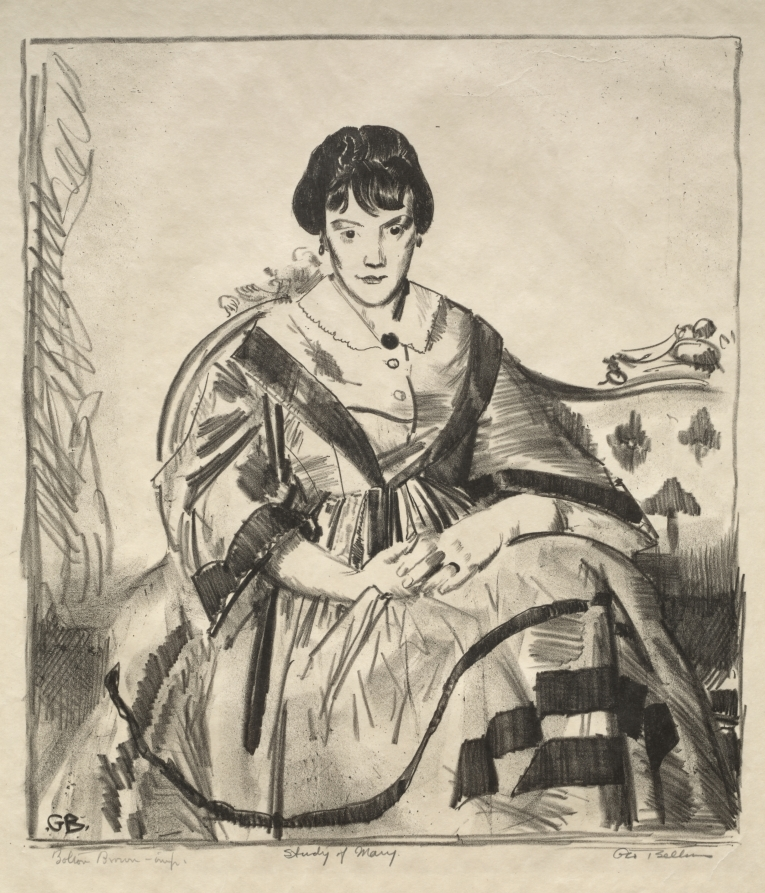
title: Study of Mary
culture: America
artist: George Bellows (American, 1882–1925)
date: 1923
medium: lithograph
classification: Print